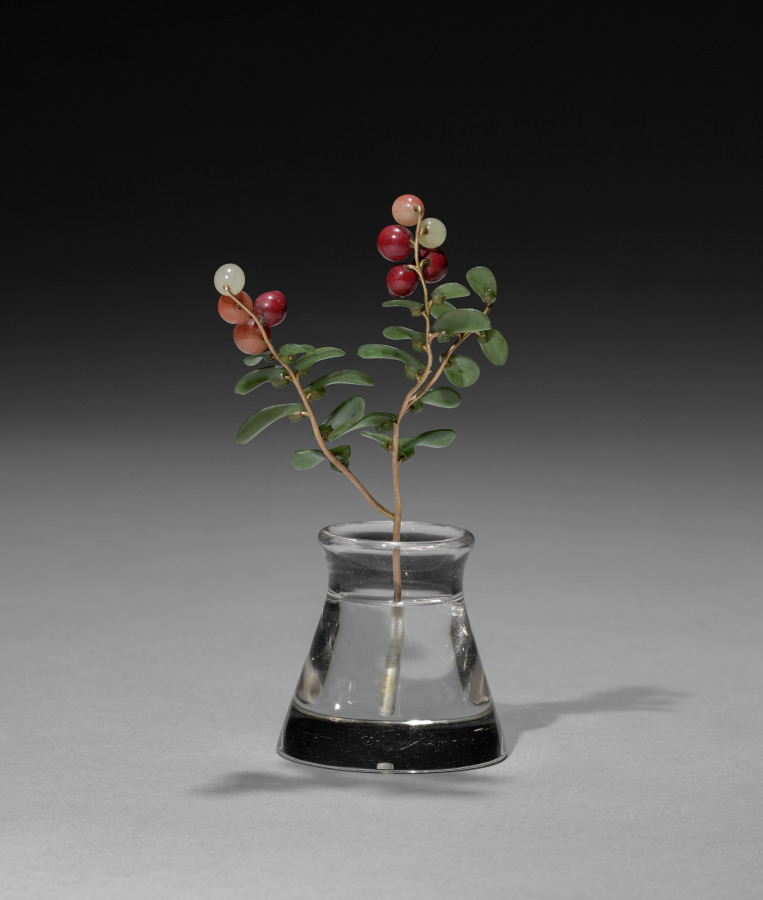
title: Flower Study of a Lowbush Cranberry or Lingonberry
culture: Russia, St. Petersburg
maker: House of Fabergé (Russian, 1842–1918)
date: c. 1885–1915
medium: chalcedony, jade, rock crystal, gold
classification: Miscellaneous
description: This flower study depicts a lowbush cranberry or lingonberry. To achieve a naturalistic effect of ripening fruit, Fabergé varied the coloring of the berries. Some are made of chalcedony in hues of milky white to represent unripe berries, while others appear in deep reddish agate to represent ripe ones. Fabergé’s inspiration for his flower studies is said to have come from the floral brooches of precious stones that were made in the 1700s for Catherine the Great as well as from the Japanese art of flower arranging, known as ikebana. Fabergé’s flower studies were given as intimate gifts to friends by the tsarina and others in the court. She also liked to take them around to wherever the imperial family was residing as a reminder of spring during the harsh Russian winters.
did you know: The stems of Fabergé’s flower studies are set into little basins carved from rock crystal to resemble pots of water.